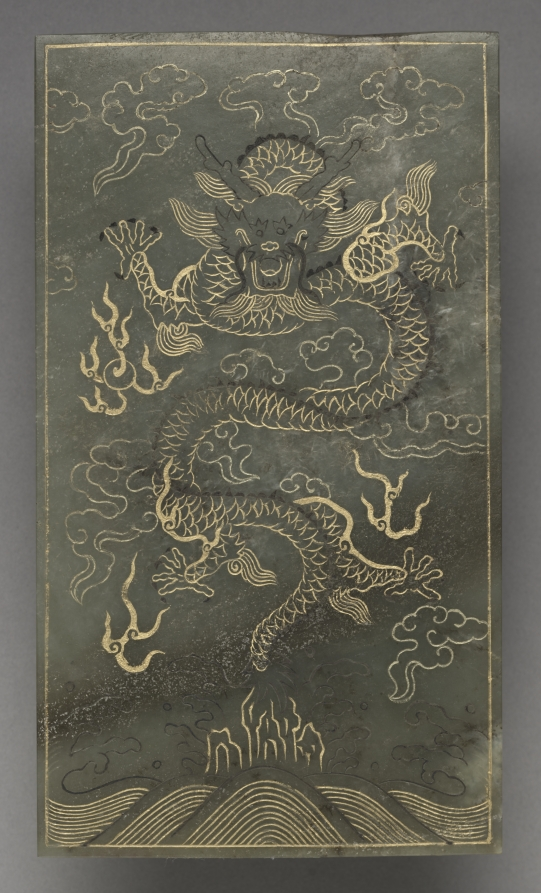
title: Tablet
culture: China, Qing dynasty (1644–1911), Qianlong reign (1736–95)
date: 1778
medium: jade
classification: Jade